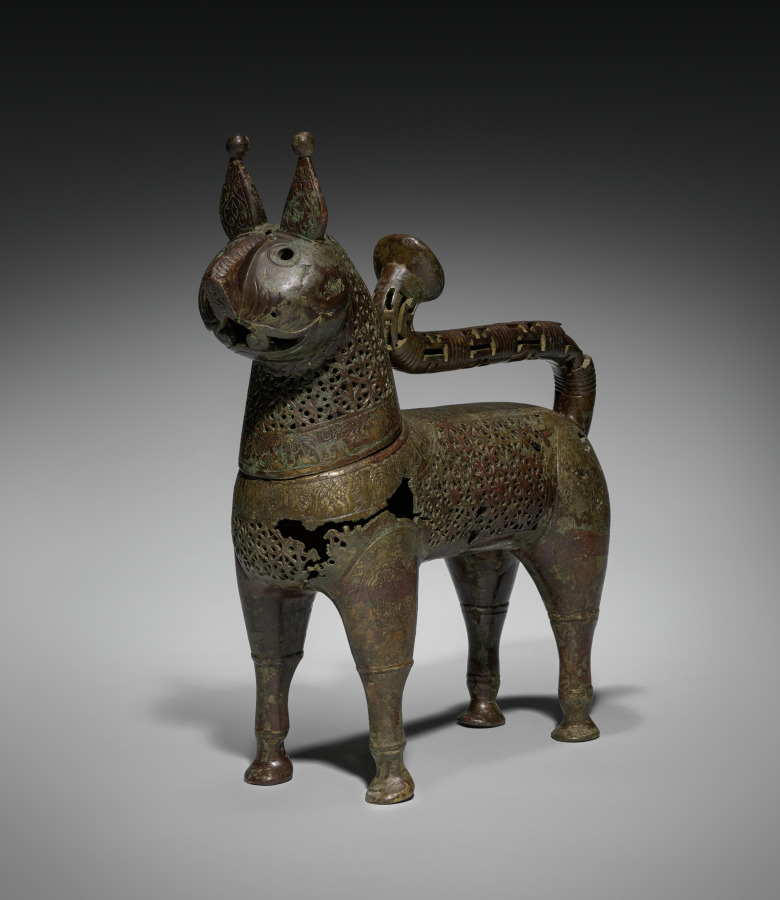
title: Feline Incense Burner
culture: Iran, Khurasan, Seljuq period of Iran (1037–1194)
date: 1150–1200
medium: Copper alloy, cast, engraved, chased, and pierced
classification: Metalwork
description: In Iran during the 1000s and 1100s, vessels in the shape of animals gained popularity, especially as incense burners. Felines were favored in Persian art and this piece may represent a caracal, a type of lynx. The head of the creature was cast separately and is removable to fill its body with hot coals and incense. Qur’anic verses on the neck and spine remind worshippers to set work aside, attend prayer, and then disperse to seek God’s bounty. The diffusion of perfumed smoke through the burner’s pierced palmette design may have served as a sensorial reminder of this teaching.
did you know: Arabic inscriptions in Kufic script against a background of scrolling arabesques run along the back and neck of the feline form.